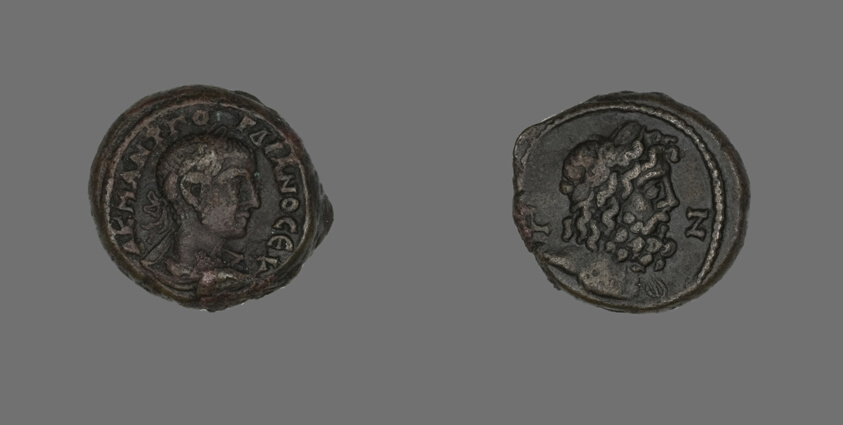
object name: Coin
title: Coin Portraying Emperor Gordian III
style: roman period (egyptian), greco-roman (egyptian)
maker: Roman, minted in Alexandria, Egypt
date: 243-244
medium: Billon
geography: Egypt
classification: coin; ancient art